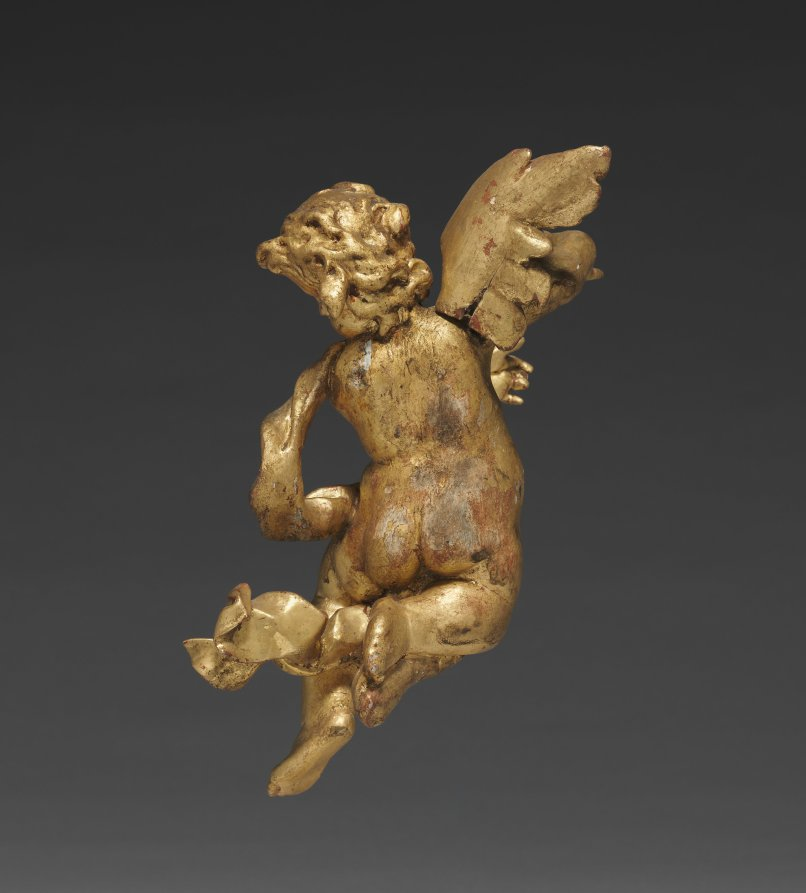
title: Altarpiece with Relics - Putto with column, upper right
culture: Germany, Bavaria, 18th century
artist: Joseph Matthias Götz (German, 1696–1760)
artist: and Workshop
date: 1735–1740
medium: gilded wood, with relics in niches: gilded wood, mother-of-pearl, ebony, red silk, gold wire, seed pearls, rock crystal, pen and ink on paper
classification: Sculpture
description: Götz covers every surface in gold leaf, giving each part of the object equal importance, rather than simply framing a central picture. In this distinctively Central European approach, figural narrative is subordinate to the overall ensemble. Götz designed this object to rest on top of an altar, probably in front of a larger painted or sculpted decorative scheme. The work contains relics seen through the small windows on the perimeter. These small remains of holy figures demonstrate the persistence of a medieval Catholic tradition well into the 1700s.